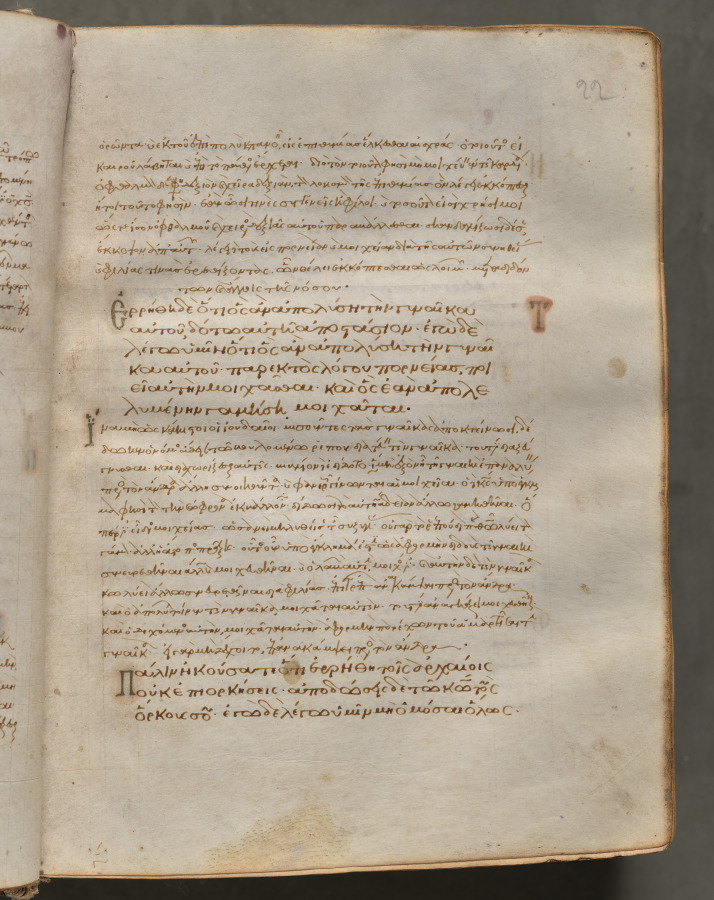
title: Text, folio 22 (recto), from a Gospel Book with Commentaries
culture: Byzantium, Constantinople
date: c. 1000–1100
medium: ink, tempera, and gold on vellum; leather binding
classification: Bound Volume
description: Each of the four gospels in this book opens on a page with brilliantly illuminated borders depicting the author of the text as well as birds-principally peacocks, symbols of the immortality of the soul-and fountains, representing the fountain of life and the salvation of the soul. This volume consists of 428 leaves with texts in Greek. Its level of sophistication suggests that it was probably written and decorated in a monastery in Constantinople.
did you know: Gospel Books were carried in procession through Byzantine churches.